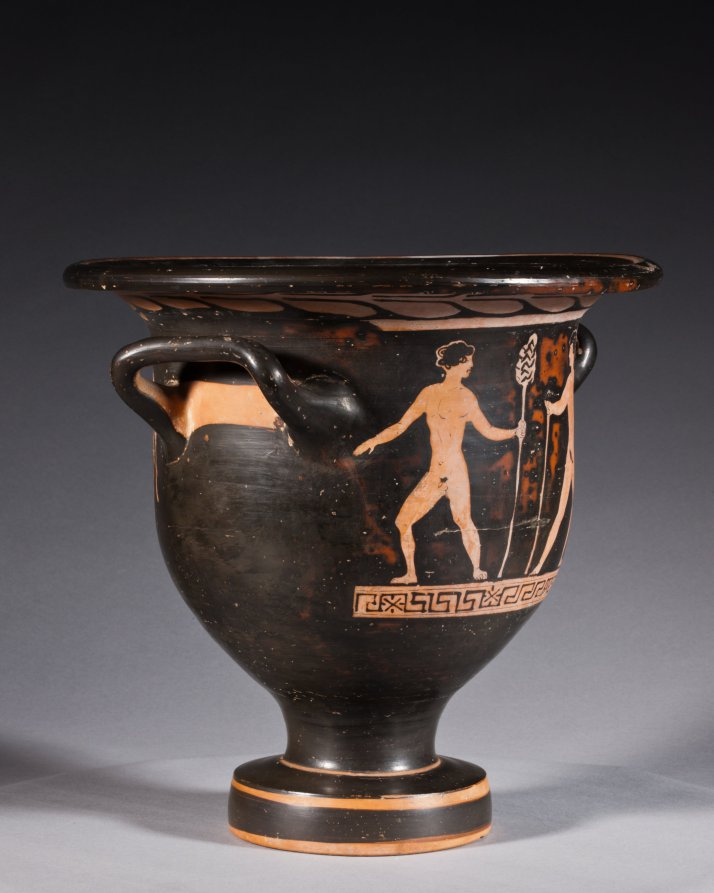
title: Red-Figure Bell Krater (Mixing Vessel): Aphrodite and Eros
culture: South Italian, Apulian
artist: attributed to Graz Painter (South Italian, Apulian, active c. 380–360 BCE)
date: c. 370–360 BCE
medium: ceramic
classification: Ceramic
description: This small mixing vessel shows a finely dressed woman seated on a chest and holding up a mirror to admire herself. Before her stands Eros, the winged god of love, holding a ribbon or sash. Behind the woman stands a pillar with the inscription ΑΦΡΟΔΙΤΗ, or APHRODITE, the goddess of love. Such labels are rare on vases, and scholars debate whether this names the woman shown as Aphrodite herself, with her son Eros, or a bride envisioning herself as Aphrodite, just before her wedding.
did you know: The dancing nude youths on the reverse are unusual; typically they would be standing and draped.